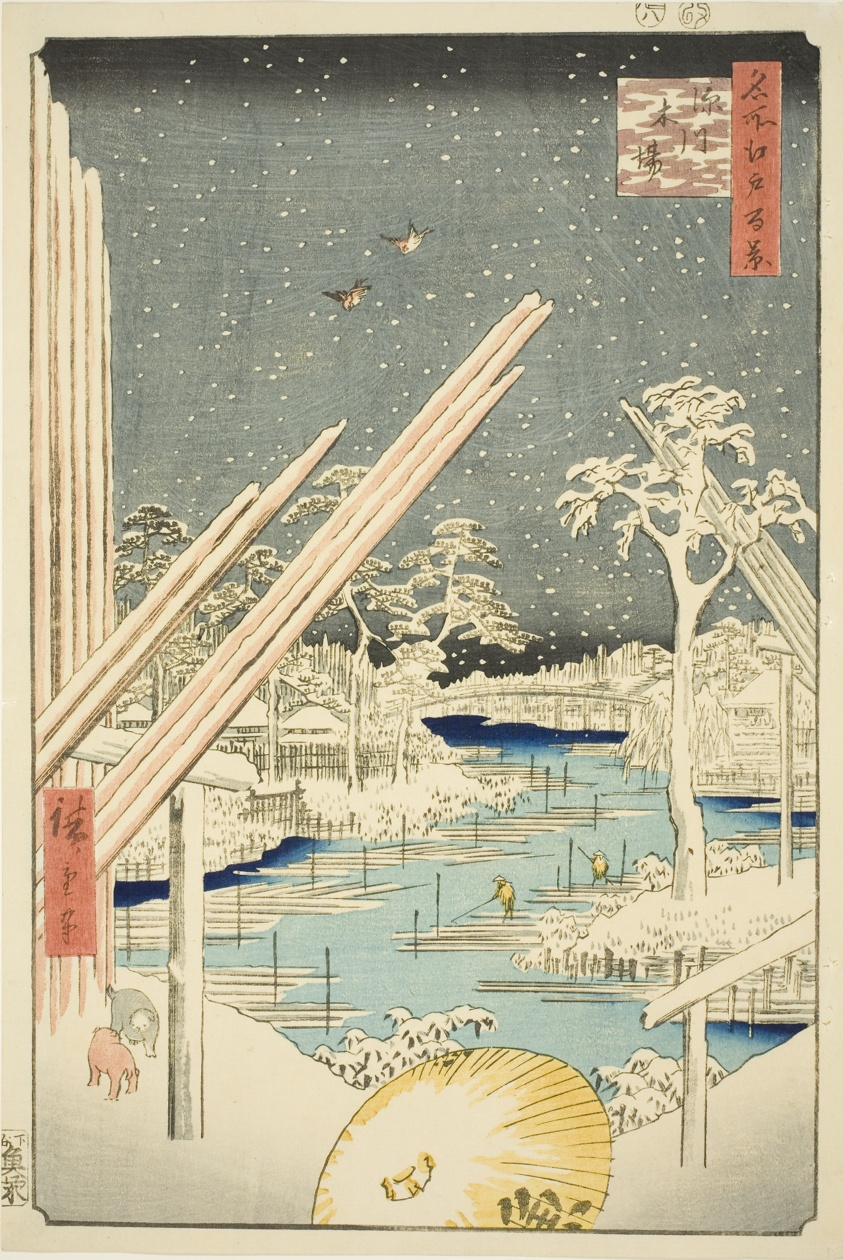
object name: Print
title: Lumberyards at Fukagawa (Fukagawa kiba), from the series "One Hundred Famous Views of Edo (Meisho Edo hyakkei)"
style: Japanese (culture or style)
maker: Utagawa Hiroshige 歌川 広重; Japanese, 1797–1858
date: 1856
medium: Color woodblock print; oban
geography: Japan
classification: woodblock print; print; asian art